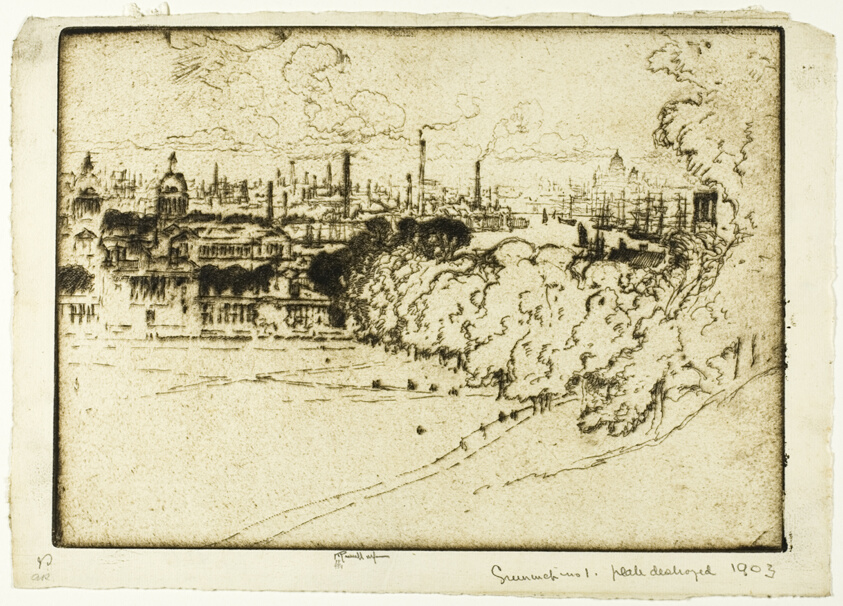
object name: Print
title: Greenwich Park, No. 1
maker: Joseph Pennell (American, 1857-1926)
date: 1906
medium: Etching in brownish ink on ivory laid paper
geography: United States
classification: etching; print; prints and drawing